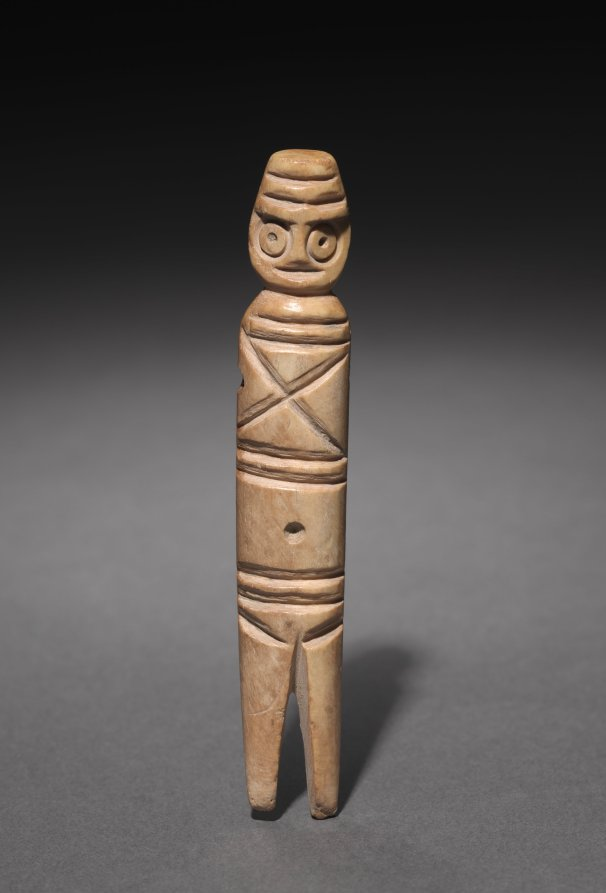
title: Amulet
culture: Parthian Empire (247 BCE–224 CE)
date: 1–200 CE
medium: carved bone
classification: Miscellaneous